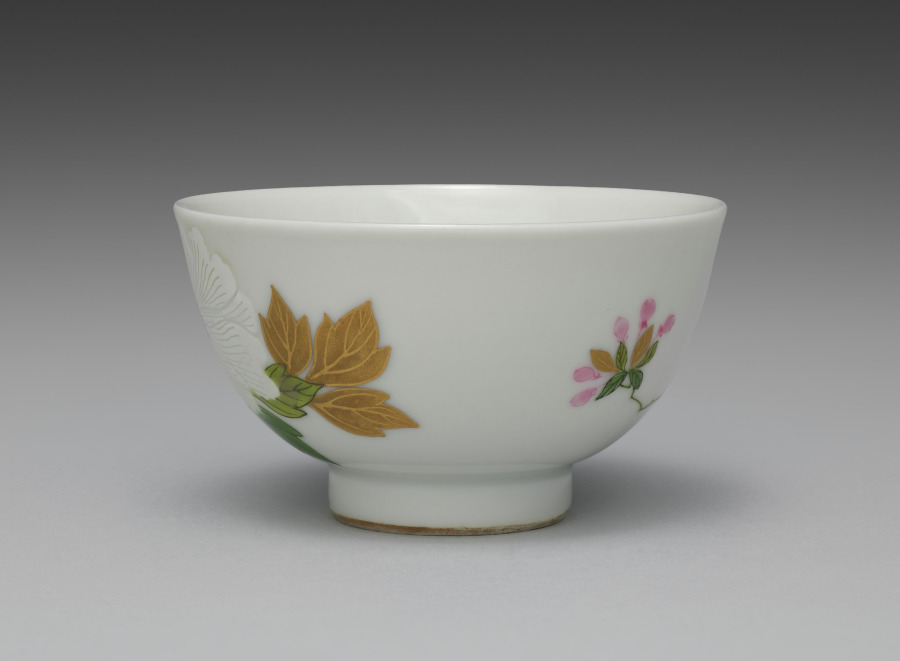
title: Teabowl from Teabowls with Peony and Crabapple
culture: Japan, Meiji period (1868–1912)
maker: Seifū Yohei III (Japanese, 1851–1914)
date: 1893–1914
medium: One from a set of five teabowls; porcelain with underglaze and overglaze color enamels and gold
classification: Ceramic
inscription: 清風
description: Overglaze color enamels are generally called iro-e (literally “color picture”) in the terminology customarily used for porcelain decoration of the Edo period. This set of teabowls is a fine example of Yohei III’s skilled use of the technique, which is identified on this set’s box lid with the alternate phrasing “porcelain with color painting” (jisaiga). Distinct from the way overglaze colors were used in Kakiemon ware from Arita, his designs and applications show a consciousness of porcelain decoration of the Qing dynasty. Here, he combines Chinese models with a sensibility taken from Kyoto ware precedents, including painting with powdered gold (kinrande). The colors used in the bowls are as follows: blue, black, gold, white, light green, green, and pink. The blue appears only inside the footring, as a double band of underglaze color. The black iron, used for stems and leaf veins, is painted over the glaze. The gold, also painted over the glaze, is used for leaves and the centers of flowers, for solid, glossy lines defining detail, or as a semimatte ground. The white of the peony flower is built up to a low relief over the glaze. Yohei has incised lines of varying widths into the pigment, carving away to the bowl’s surface, to differentiate individual petals and their rippled shapes. The light and dark greens, as well as the pink, are painted over the glaze. Of note is how Yohei has first used thinly applied lines of light green to draw the plum branch before applying the opaque iron black. For the plum buds and flowers, he has used a diluted pink with an opaque pink for outline, both over the glaze. In his later works, Yohei used pink both over and under the glaze in a manner similar to underglaze blue, and it can be challenging in some cases to discern which technique he has used. A lidded container in a private collection has a similar design but is augmented with the inclusion of white and purple magnolia blossoms. In contemplating the original decorative program of a set, of which these teabowls may have been a part, it is worth considering that perhaps not all objects included the full range of motifs. In such cases, the composition of the individual object may be best understood within the context of the extended ensemble. Here, the delicate pink plum on one side of the bowl seems slightly unbalanced with the bold white peony on the other, but when seen with other objects with the magnolia and its additional colors and shapes, it is possible to imagine a set with a complex, balanced design across multiple pieces.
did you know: Because four is considered an unlucky number, it became customary to assemble groups of guests of five or multiples of five.